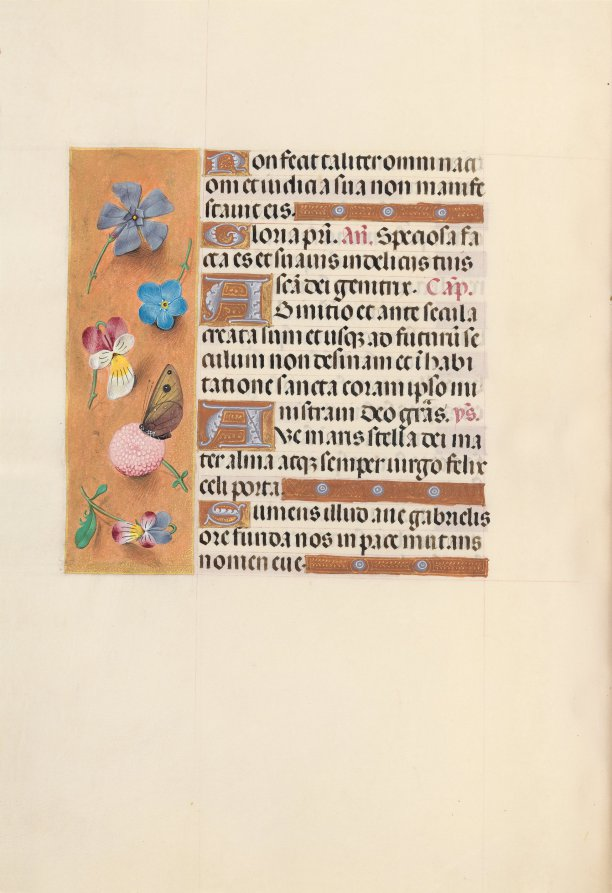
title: Hours of Queen Isabella the Catholic, Queen of Spain: Fol. 150v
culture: Flanders, Ghent and Bruges, late 15th century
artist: Master of the First Prayerbook of Maximillian (Flemish, c. 1444–1519)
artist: and Associates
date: c. 1500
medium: ink, tempera, and gold on vellum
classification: Bound Volume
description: This manuscript was illuminated by a circle of at least five highly organized manuscript painters active in the Flemish cities of Ghent and Bruges. The principal illuminator was Alexander Bening, who painted the majority of the book's miniatures. Manuscripts produced by this circle of artists are renowned for the decoration of their borders, which typically feature a rich variety of realistically-painted flowers, birds, and butterflies. This prayer book, called a book of hours, was intended not for a cleric, but for the private devotions of a lay person-in this case, Isabella the Catholic, Queen of Spain (1451-1504). Isabella's coat of arms embellishes the book's frontispiece. It is unlikely that the book was commissioned by the Queen herself; rather, she probably received it as a diplomatic gift from someone courting her patronage, perhaps Cardinal Francisco Jimenez de Cisneros. A Franciscan friar, Jimenez was dependent upon Isabella for his advancement, first to the post of Queen's confessor in 1492, and then to Archbishop of Toledo in 1495.